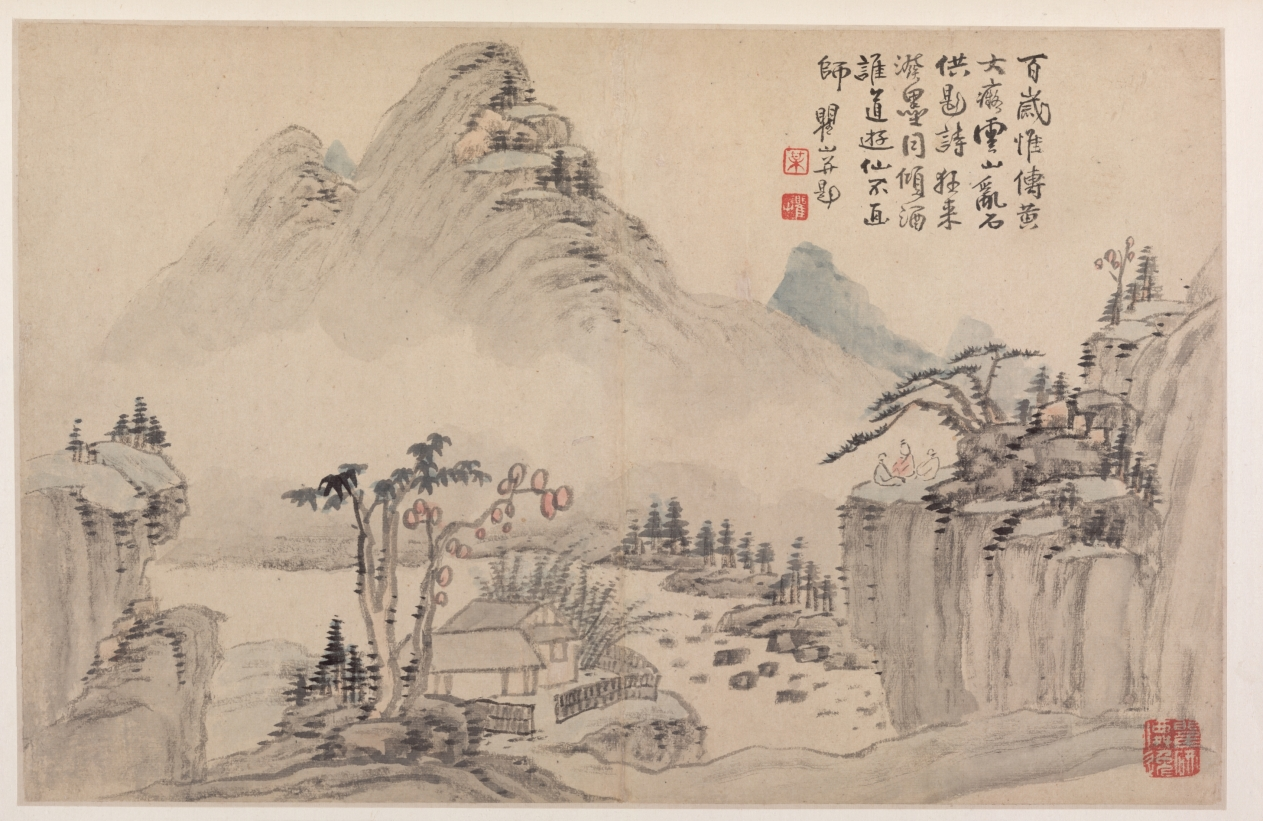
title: Landscapes in Various Styles after Old Masters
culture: China, Qing dynasty (1644-1911)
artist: Mei Qing (Chinese, 1623–1697)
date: 1690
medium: album leaf: ink and color on paper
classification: Painting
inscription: Autumn Leaf I (Formerly Leaf C). Artist's inscription, signature, and seals: For hundreds of years only Huang Dachi [Huang Gongwang] has been handed down from generation to generation./ His cloudy mountains and scattered rocks continue to inspire the composing of poetry./ When frenzied inspiration came, he splashed ink as if pouring out wine;/ Who says this wandering immortal wasn't a painting master? Qushan [painted] and inscribed. [2 seals] Mei; Qushan. [seal, lower right corner] Quxing hsien-i.